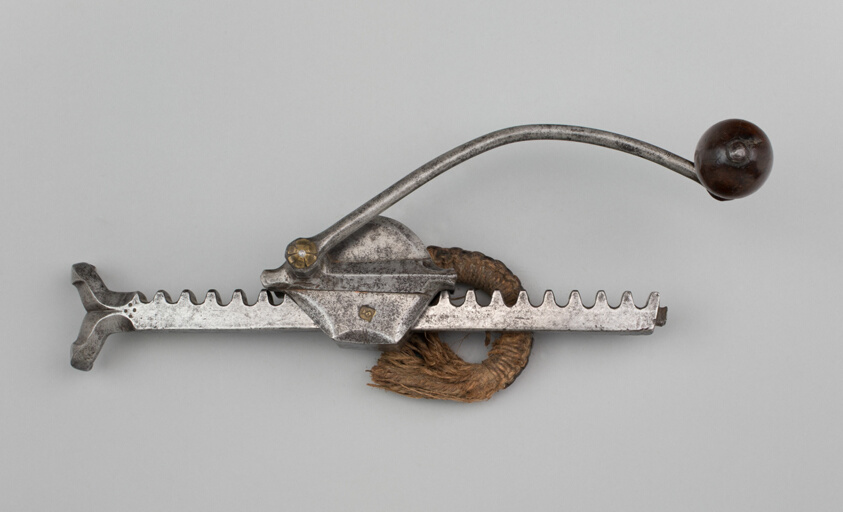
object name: Arms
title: Cranequin (Winder) for a Crossbow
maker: German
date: first half of 16th century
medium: Iron, wood, and cord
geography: Europe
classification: crossbow; arms; arms and armor